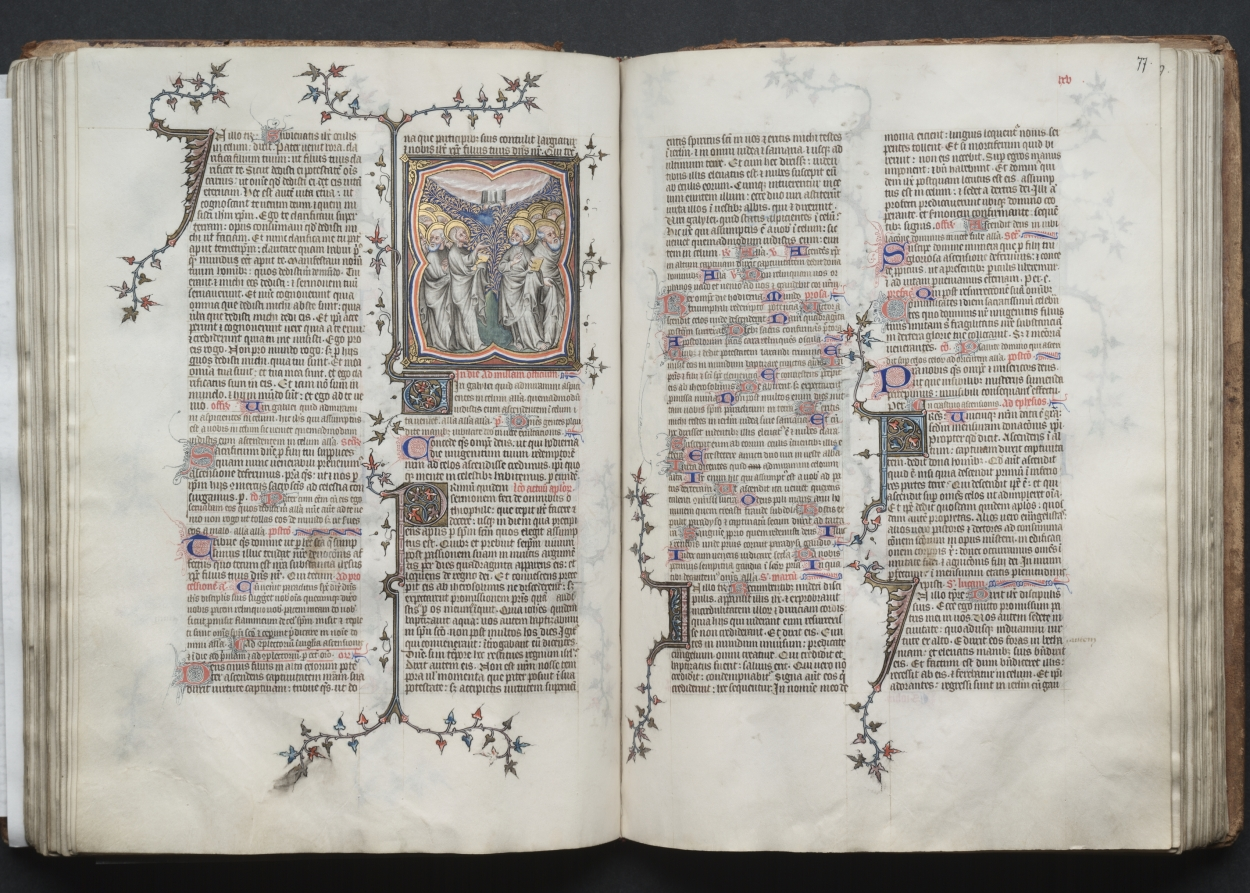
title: The Gotha Missal: Fol. 76v, The Ascension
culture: France, Paris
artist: Master of the Boqueteaux (French)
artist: and Workshop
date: c. 1375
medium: ink, tempera, and gold on vellum; blind-tooled leather binding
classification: Bound Volume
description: The style and quality of this manuscript's decoration is typical of deluxe Parisian books made for aristocratic or royal patrons. Most of the book's decoration appears to be the work of the Master of the Boqueteaux, an artist active at the court of King Charles V (died 1380). His style was apparently shared by a number of book illuminators working in and around Paris. It is very possible that the Gotha Missal belonged to Charles V, but is not provable because the manuscript has no royal portraits and lacks a colophon. Given the book's magnificent decoration, however, it would seem that it was produced for a Valois prince, if not for the king himself. The manuscript receives its name from the German dukes of Gotha, its later owners.